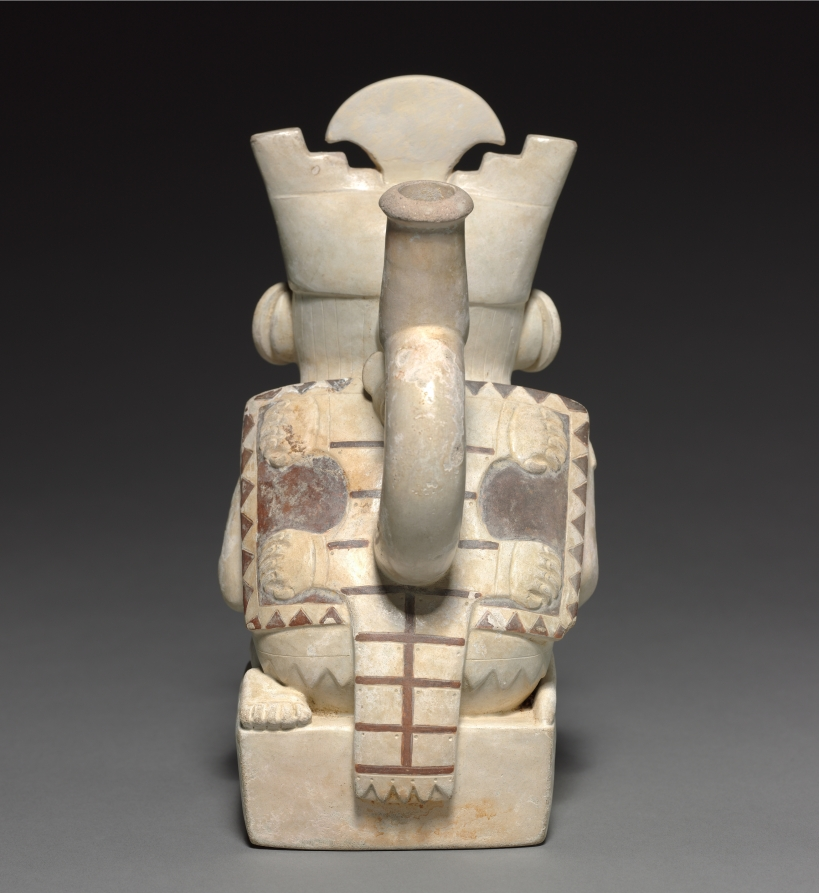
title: Warrior Vessel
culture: Peru, North Coast, Moche, Moche style (50-800)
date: c. 50–200 CE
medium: earthenware with colored slips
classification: Ceramic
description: This vessel's exquisite, crisp detail rewards careful viewing. The modeling of the feline pelt on the back is especially delicate and sharp, and each of the squares on the tunic carries a tiny dot in the upper corners, as though the squares represent plates of metal or shell attached to fabric. The face is decorated with paint or tattooing, and the headdress supports a curved, blade-shaped form.